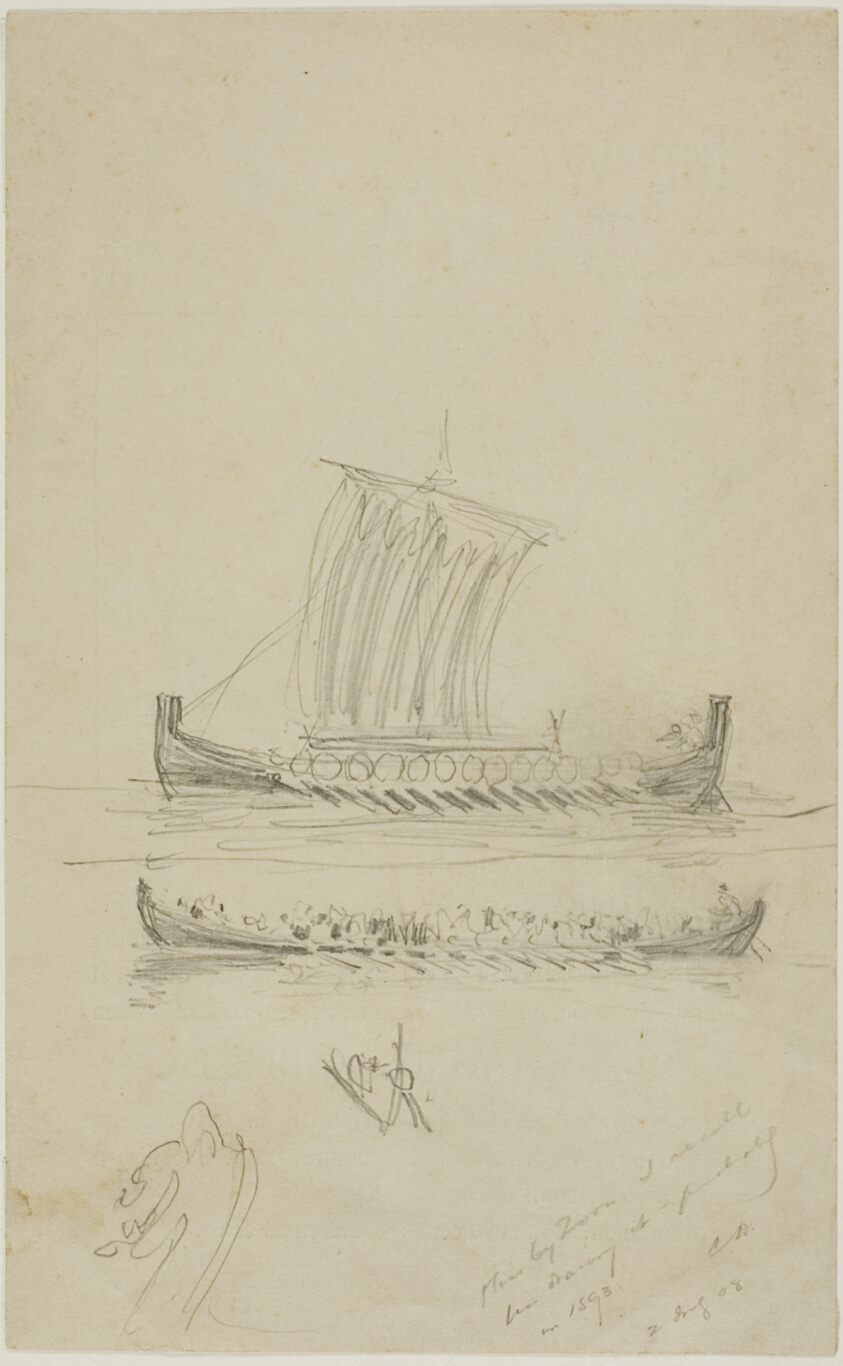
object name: Drawing and Watercolor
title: Sketch of Captain Anderson's Sailing Vessel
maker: Anders Zorn (Swedish, 1860-1920)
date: 1893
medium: Graphite on tan wove paper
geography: Sweden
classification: graphite; drawings (visual works); prints and drawing